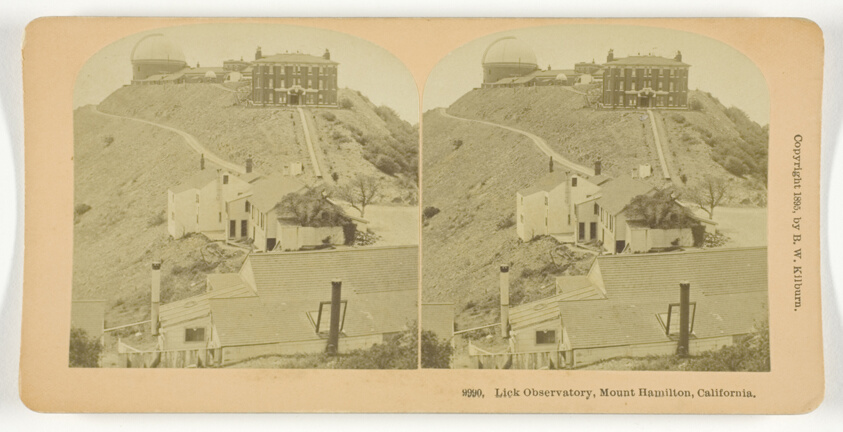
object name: Photograph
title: Lick Observatory, Mount Hamilton, California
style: 19th century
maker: B. W. Kilburn; American, 1827–1909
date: 1895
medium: Albumen silver print, stereo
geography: United States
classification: stereograph (albumen); albumen silver print; photographic process; photography; photograph